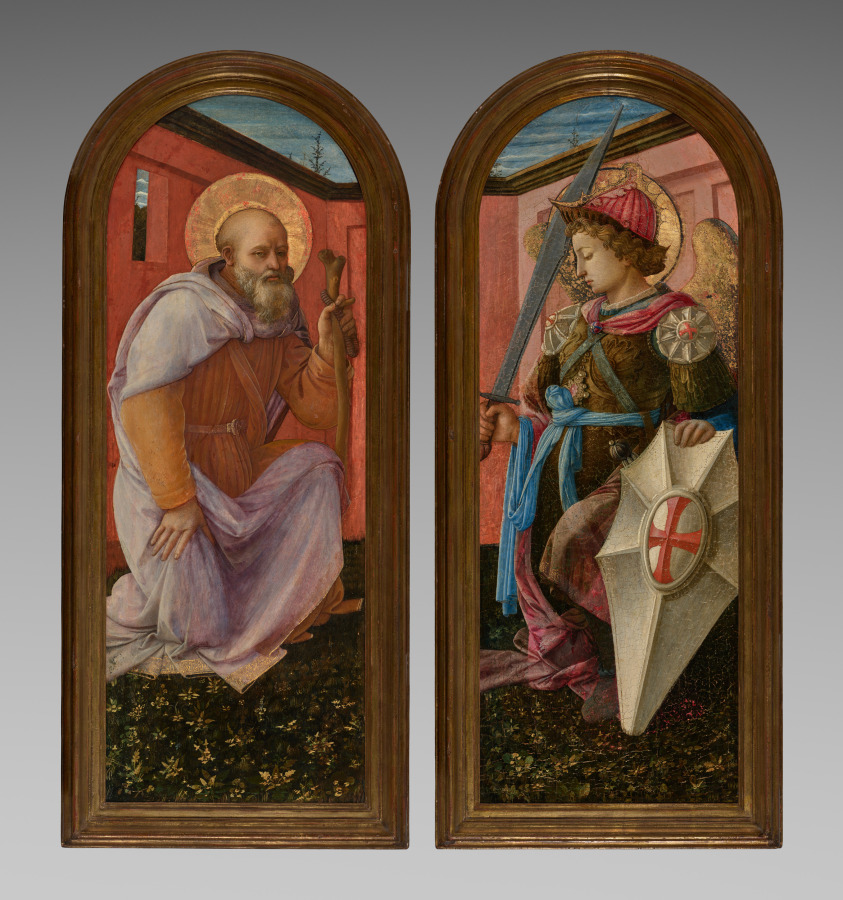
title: Pair of Panels from a Triptych: The Archangel Michael and St. Anthony Abbot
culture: Italy, Florence, 15th century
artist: Fra Filippo Lippi (Italian, c. 1406–1469)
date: 1458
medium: tempera on wood panel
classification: Painting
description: These panels depicting Saints Anthony the Abbot and Michael originally flanked a central scene of the Madonna and Child with Angels, now lost, to form a triptych. Giovanni di Cosimo de’ Medici of Florence commissioned the ensemble in 1457 as a diplomatic gift to Alfonso V of Aragon. Fra Filippo Lippi, a Carmelite friar and one of the great masters of early Renaissance Florence, depicted realistic, weighty figures in a three-dimensional space using a system of linear perspective, inspired partly by Masaccio’s Brancacci Chapel, and reflected in the background architecture. Saint Anthony the Abbot rejected all earthly possessions in pursuit of a contemplative life in the desert. He is generally regarded as the founder of monasticism and is depicted wearing a monk’s habit. Saint Michael’s sword, shield, and exquisitely bejeweled armor celebrate his role as heaven’s defender against evil.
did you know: Saint Michael's opulent appearance reflects the wealth and status of both the patron and the recipient of these paintings.